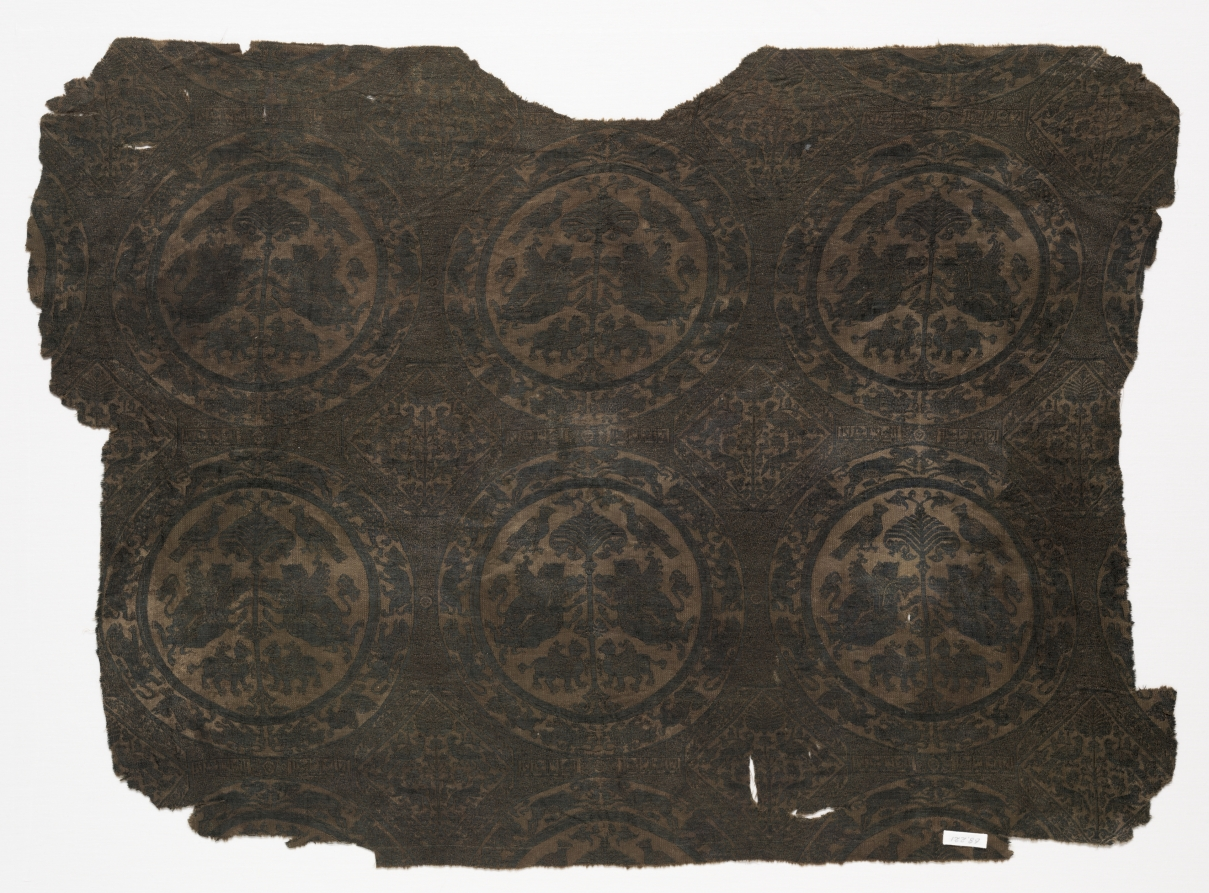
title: Fragment with lions and griffins in combat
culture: Iran ?, in the style of the Buyid period (945–1055)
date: 1459–1669 (radiocarbon date, 95% probability)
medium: Silk: lampas weave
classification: Textile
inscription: "wa-kull ma badharahu al-Rahman la-mu 'awwal"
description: Against a diaper-patterned background are roundels each containing a Tree of Life flanked by a lion and dragon in combat, birds, and griffins. The rondels are framed with a frieze of running animals. Twelve-sided figures in the interspaces enclose diamonds with pairs of confronted birds and animals flanking another Tree of Life.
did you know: A Kufic inscription is in the rectangular frame between each rondel.